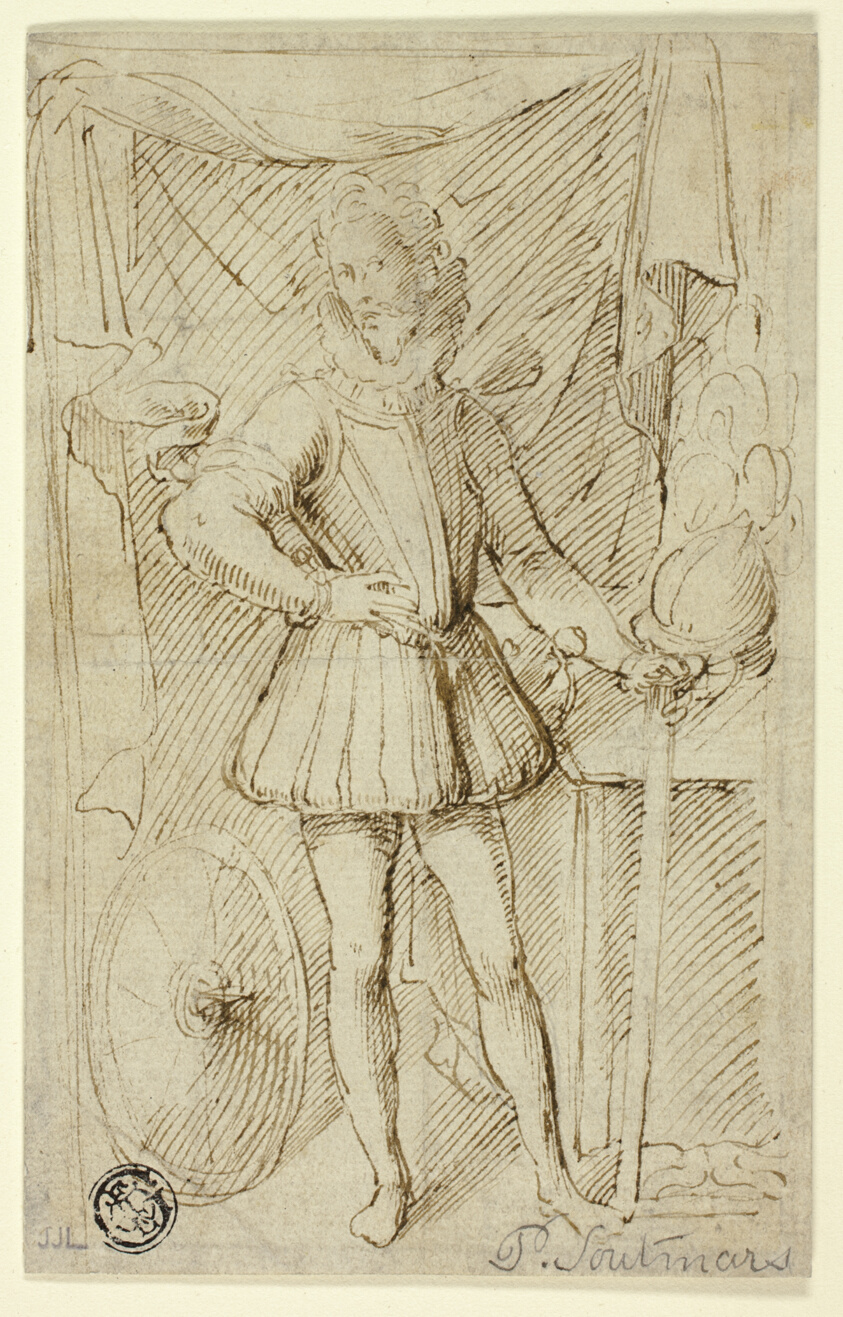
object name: Drawing and Watercolor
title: Portrait of a Nobleman in Armor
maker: Pieter Claesz. Soutman (Dutch, c. 1580-1657); or possibly after Jan van de Velde, II (Dutch, c. 1593-1641); or possibly Frans Pourbus, the younger (Flemish, 1569-1622); or the school of Marcus Geeraerts, the younger (Flemish, 1561-1635)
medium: Pen and brown ink, with traces of graphite, on buff laid paper, laid down on card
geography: Flanders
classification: pen and ink drawings; drawings (visual works); prints and drawing